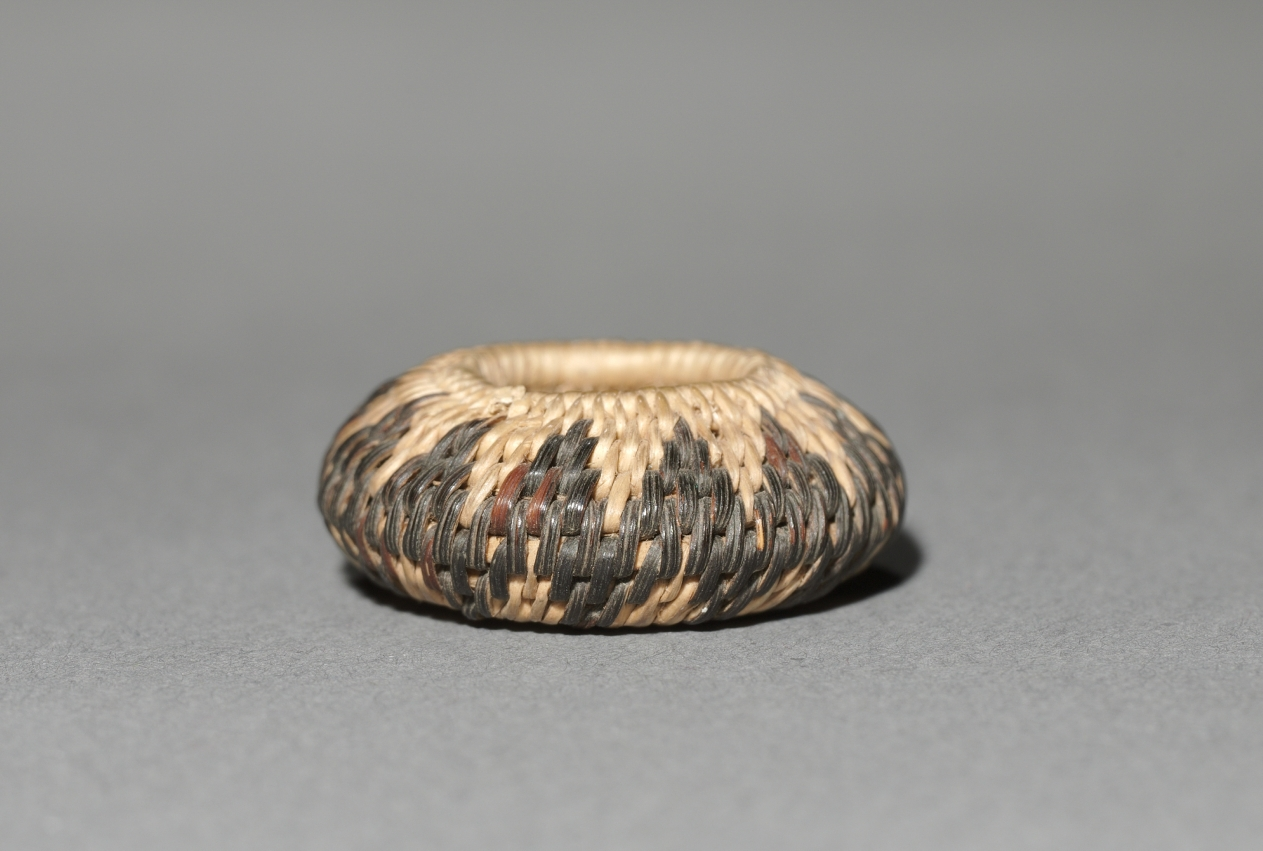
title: Miniature Round Basket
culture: California, Pomo, late 19th-early 20th century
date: late 1800s-early 1900s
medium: plant materials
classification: Basketry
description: Miniature baskets were made to demonstrate the basket-maker’s virtuoso skill, and these tiny marvels seem to be no exception—the smallest are only five millimeters wide but still patterned. For such fine work, dexterity was required as much for preparation of materials as for weaving.